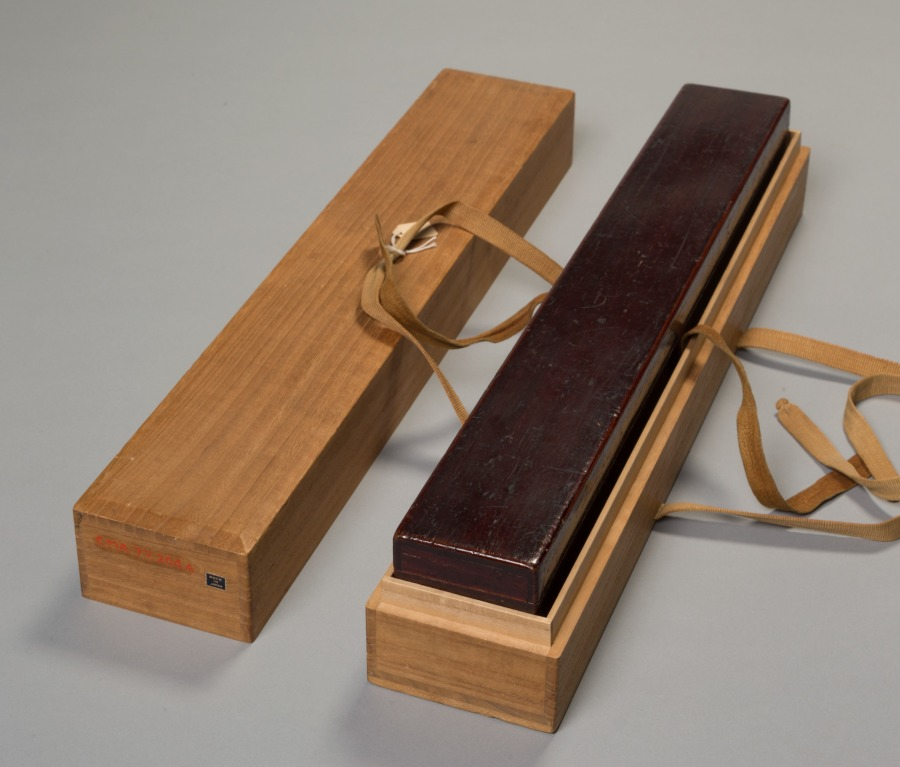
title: Seated Priest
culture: Japan, Momoyama period (1573-1615) to Edo period (1615-1858)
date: late 1500s-1650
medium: hanging scroll; ink on paper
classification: Painting